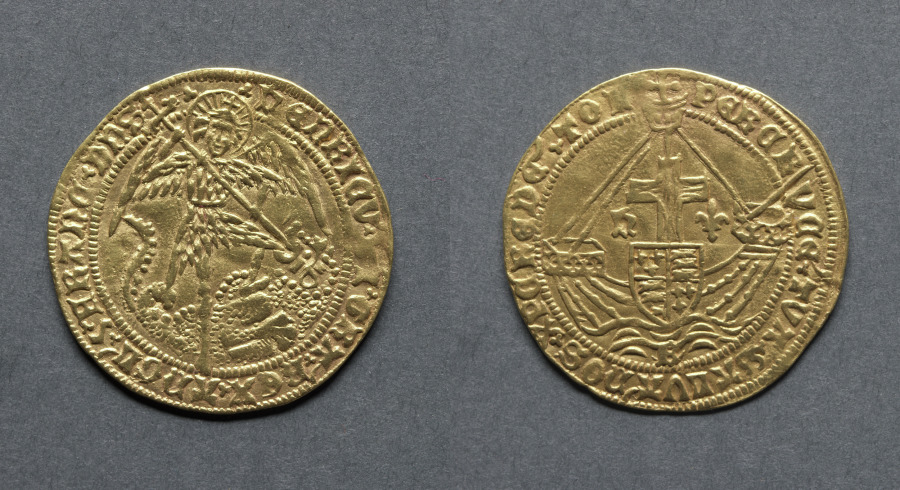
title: Angel: St. George Slaying the Dragon (obverse); Ship with Shield of Arms and Cross (reverse)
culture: England, Henry VI 1422-1461 (restored 1470-1471)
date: 1470–71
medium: gold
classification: Coins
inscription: HENRIC VI DI GRA REX ANGL FRANC DNS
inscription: PER CR VCE TVA. SALVA NOS XPC REDETOR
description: Henry VI regained power briefly in the usurpation period. The only gold coins struck during this short period were the angel and half angel, and only London and Bristol operated as mints.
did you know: The angel was an English gold coin introduced by Edward IV in 1465 and named for the depiction of St. George on the obverse.